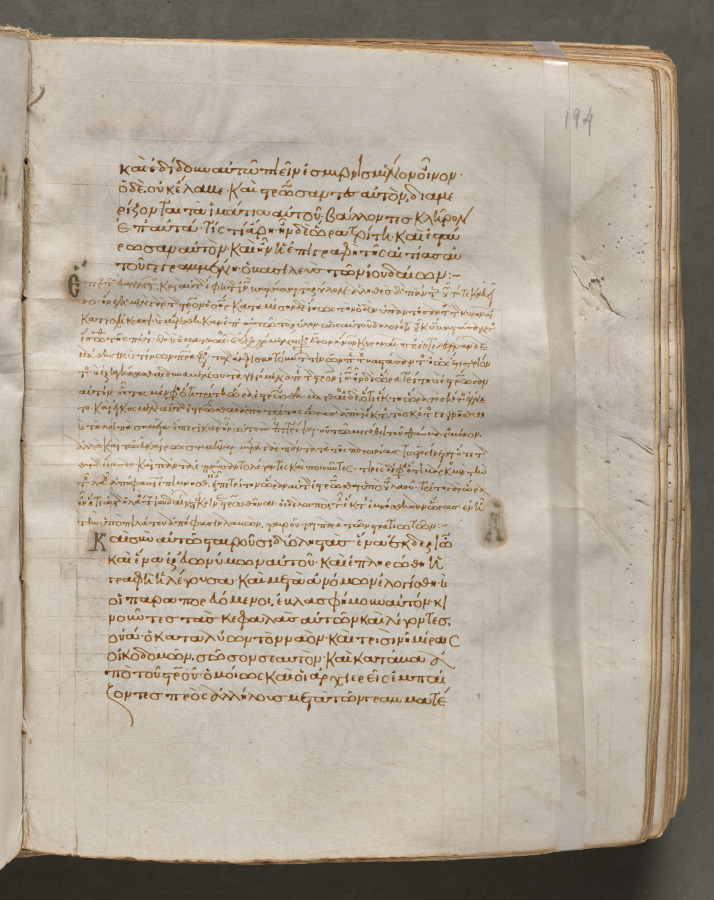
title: Text, folio 194 (recto), from a Gospel Book with Commentaries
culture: Byzantium, Constantinople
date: c. 1000–1100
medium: ink, tempera, and gold on vellum; leather binding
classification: Bound Volume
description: Each of the four gospels in this book opens on a page with brilliantly illuminated borders depicting the author of the text as well as birds-principally peacocks, symbols of the immortality of the soul-and fountains, representing the fountain of life and the salvation of the soul. This volume consists of 428 leaves with texts in Greek. Its level of sophistication suggests that it was probably written and decorated in a monastery in Constantinople.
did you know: Gospel Books were carried in procession through Byzantine churches.